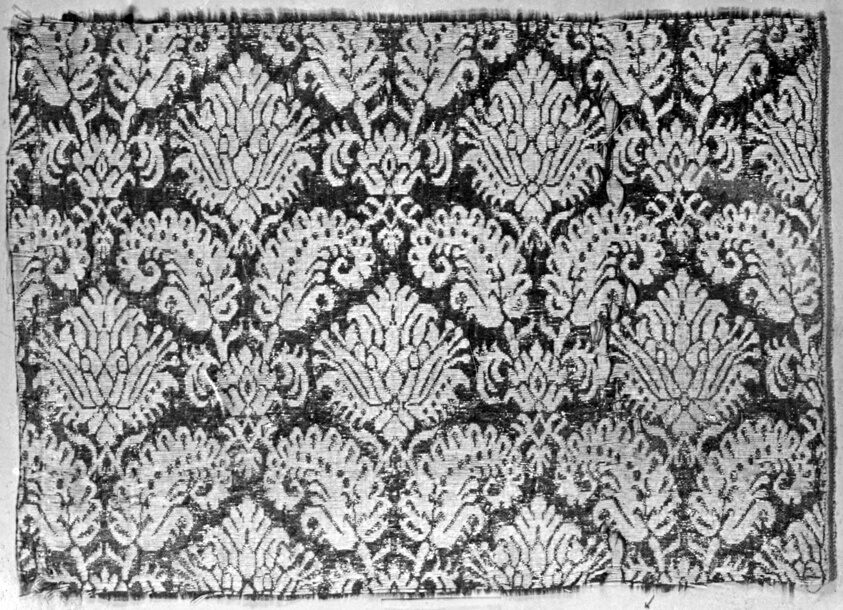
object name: Textile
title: Fragment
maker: Netherlands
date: 17th century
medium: silk and linen, double cloth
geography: Netherlands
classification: textile; weaving